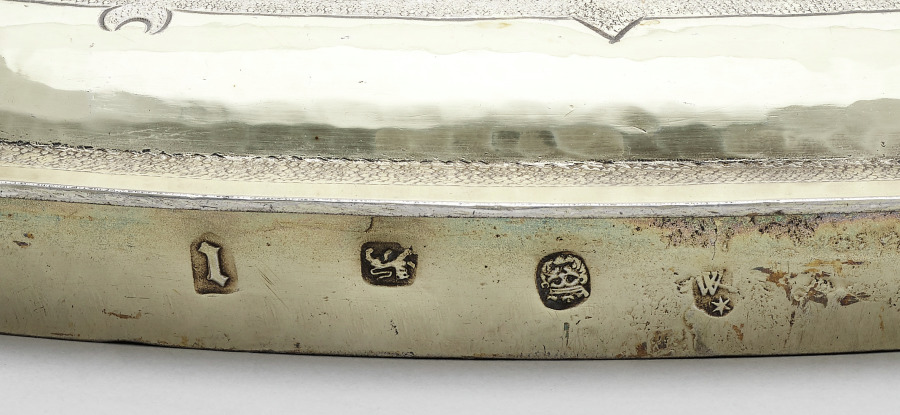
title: Cover for a Two-Handled Cup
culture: England, London, 17th century (James II)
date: 1686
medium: silver gilt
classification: Silver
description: Produced a year after the coronation of James II (1633–1701), this lid and the accompanying cup celebrate the monarchy and reflect the political and social alliances that underpinned the aristocracy during the 1600s. During their coronation, James II and his second wife Mary of Modena (1658–1718) were carried through the city of London under a silk canopy adorned with motifs inspired by European perceptions of Chinese art, known as chinoiserie. Following the procession, the thirty-two lords involved in the ceremony were each offered a portion of the cloth from the canopy as well as sixteen troy ounces of silver from the posts. At least two of them commissioned cups adorned with chinoiserie to be made from the silver. While it is unclear if this cup once belonged to one of the thirty-two peers, it was almost certainly created in response to the same motifs and social developments.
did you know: This lid accompanies a two-handled cup. See cover record.